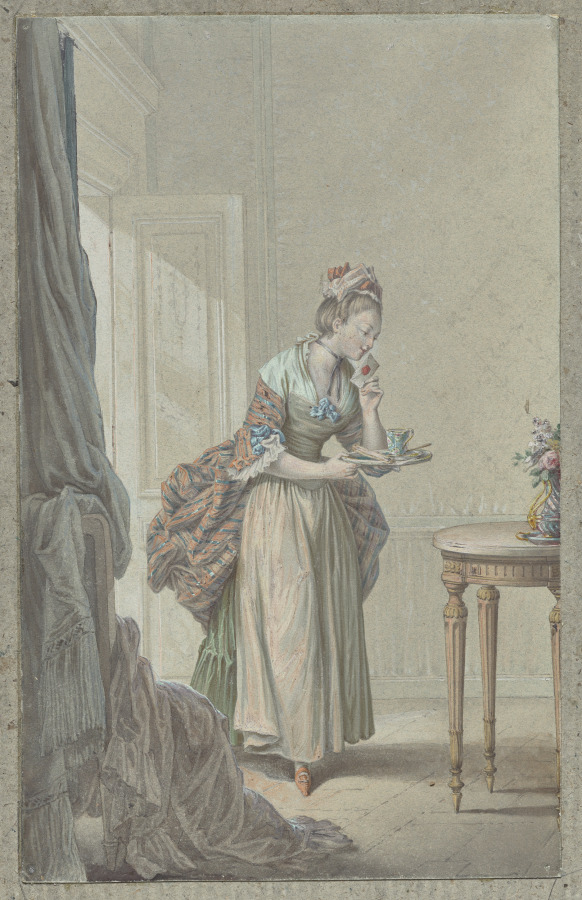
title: Woman with a Letter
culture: France, 18th century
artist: attributed to Sigmond Freudeberg (Swiss, 1745–1801)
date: 1750–1800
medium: Watercolor and gouache with point of brushwork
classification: Drawing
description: An elegantly dressed woman stands at the center of the composition. She carries a plate with a tea cup and saucer in one hand while she holds a letter, marked with a prominent red seal, up to her lips with the other. This drawing captures the woman in mid-action as she tiptoes across the room.